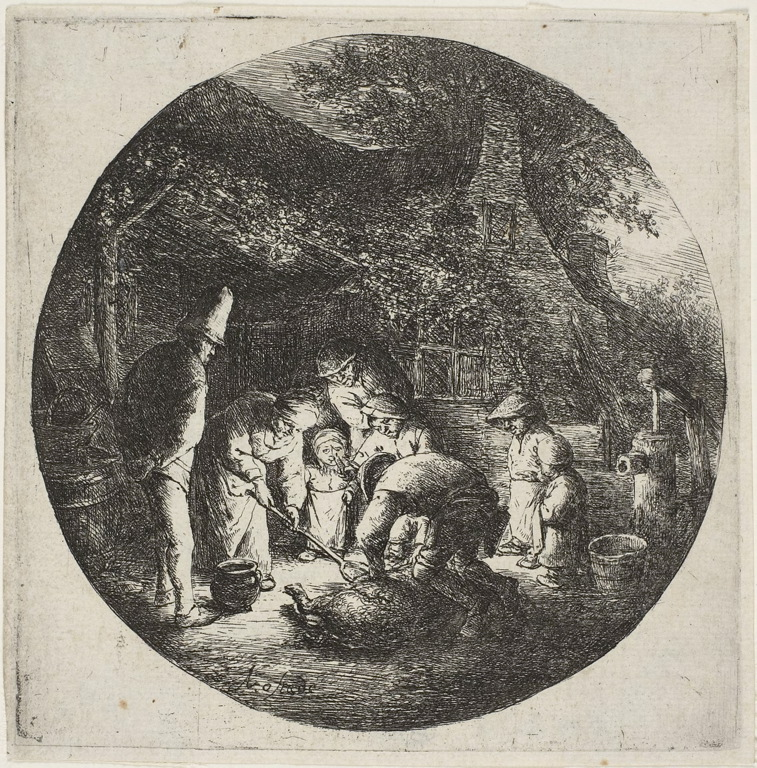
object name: Print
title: The Pigkillers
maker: Adriaen van Ostade (Dutch, 1610-1685)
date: c. 1652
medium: Etching in black on ivory laid paper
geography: Holland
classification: etching; print; prints and drawing